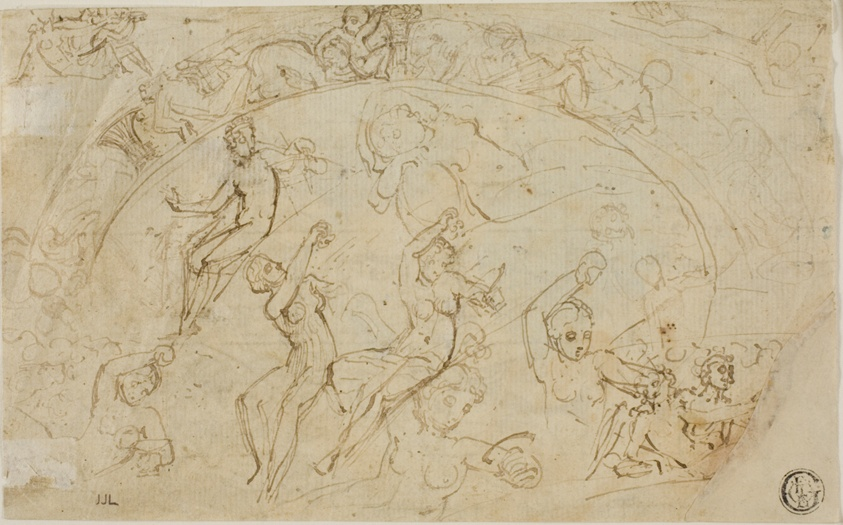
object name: Drawing and Watercolor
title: Sketches for Silver Salver (recto); Sketches of Friezes, Groups of Women (verso)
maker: Recto by Thomas Stothard (English, 1755-1834); Verso possibly by Thomas Stothard (English, 1755-1834)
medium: Pen and brown ink (recto), and pen and brown ink with brush and brown wash and watercolor (verso); on cream wove paper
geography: England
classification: pen and ink drawings; drawings (visual works); prints and drawing